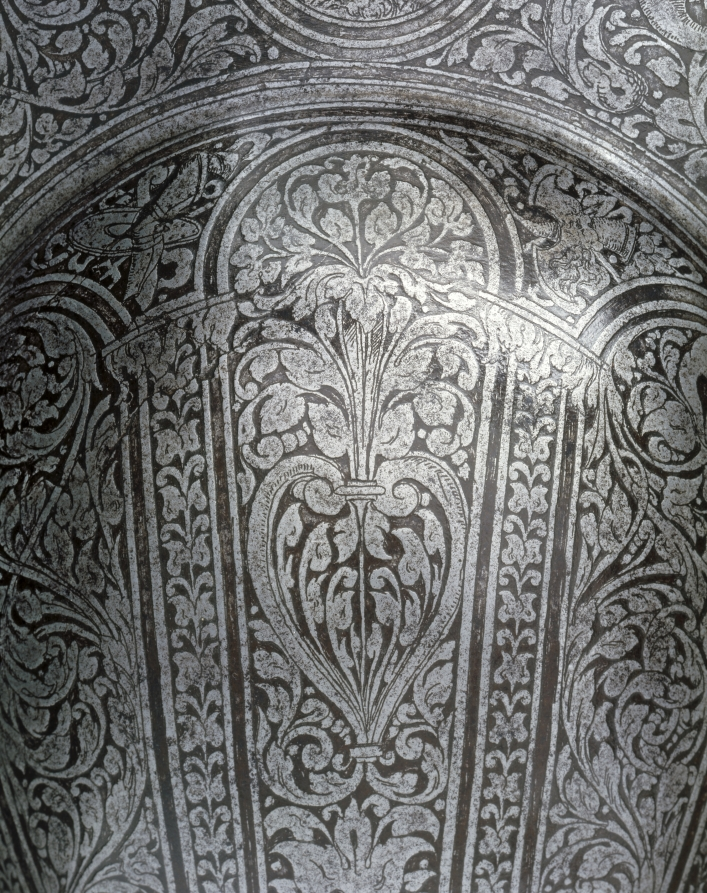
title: Morion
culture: North Italy, late 16th Century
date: c. 1575–1600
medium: steel with etched floral motif and medallion (on comb) with boar under oak tree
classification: Arms and Armor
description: The morion, an open helmet characterized by a tall comb and curved brim peaking before and after, was popularly associated with the Spanish conquistadors in the New World. In fact, morions were worn by infantry and light horsemen throughout Europe. They were also commonly worn by palace guards and thus often were decorated. This example has been beautifully etched over its entire surface. Armor this exquisitely decorated would not have been worn in battle, but used by palace guards for ceremonies and display.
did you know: Amongst the swirling floral patterns on this helmet, there is scene of a boar under a tree in the center medallion of the comb that tops the helmet.